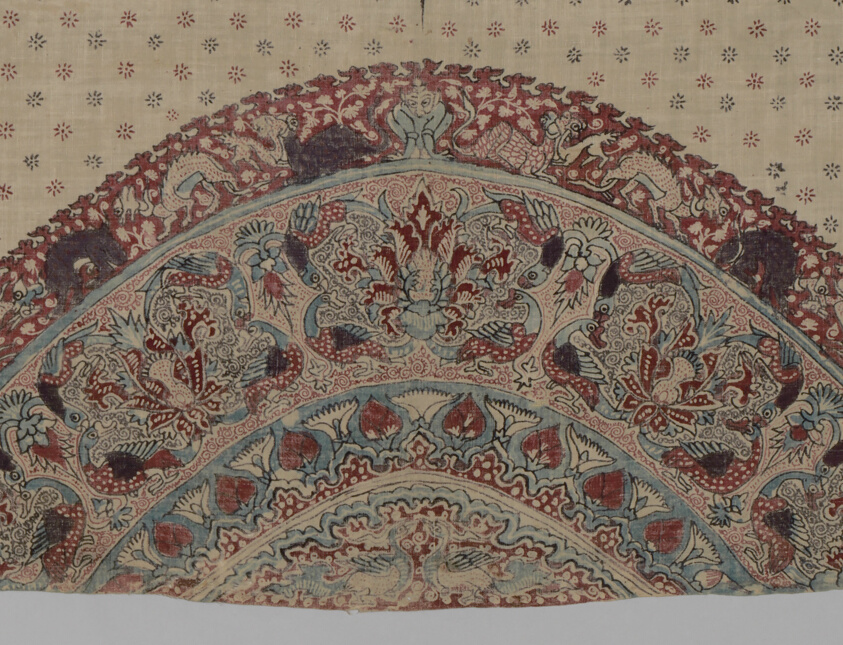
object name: Textile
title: Painted cotton with medallion and figures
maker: Deccan, India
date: 15th century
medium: cotton, plain weave; painted mordant; resist-dyed; painted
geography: India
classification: textile; weaving - printed